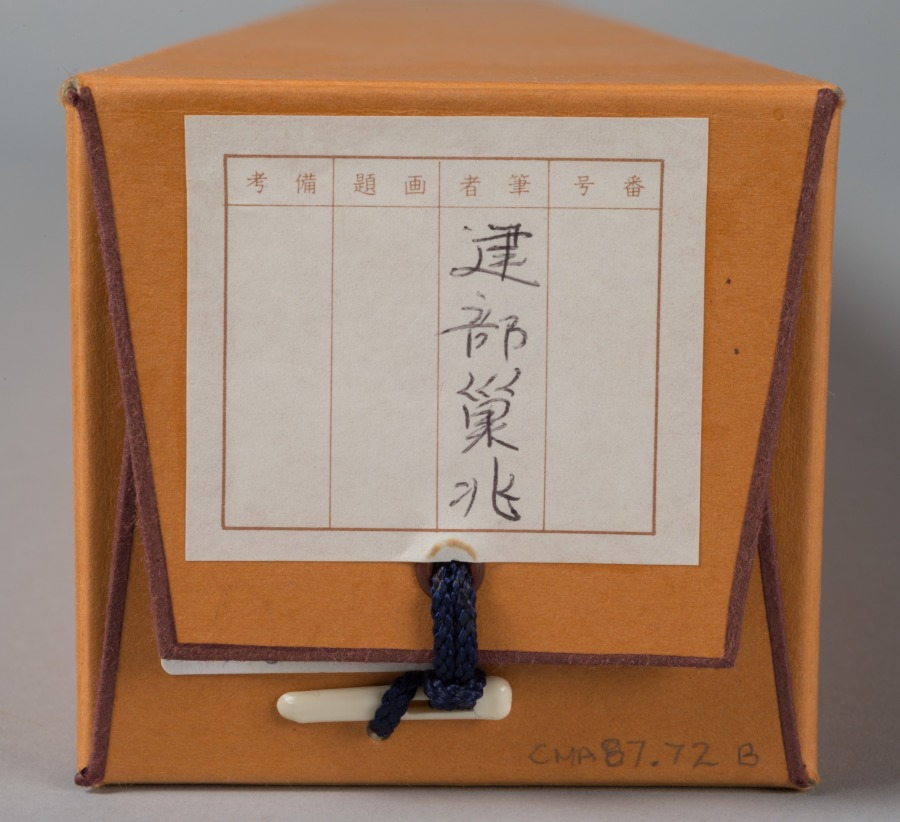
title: Genre Figures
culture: Japan, Edo period (1615–1868)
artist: Takebe Sōchō (Japanese, 1760–1814)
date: c. 1816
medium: hanging scroll; ink and color on paper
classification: Painting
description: Though rarely mentioned in official histories, Sōchō was an accomplished painter whose talent is readily apparent to the modern eye. For his compositions he chose traditional Japanese stories or everyday events. This scroll is part of a triptych of paintings converted from the folding screen format into the hanging scroll format.